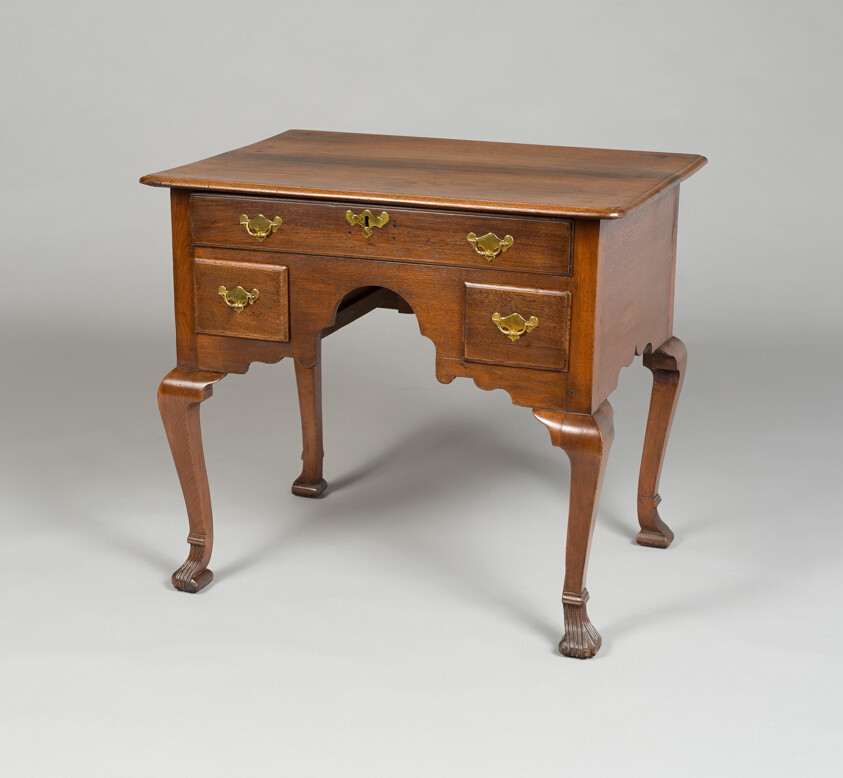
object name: Furniture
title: Dressing Table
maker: Artist unknown (American, 18th century); Philadelphia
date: 1729–60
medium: Walnut and white pine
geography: Philadelphia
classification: table; furniture; american decorative arts; american arts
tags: furniture